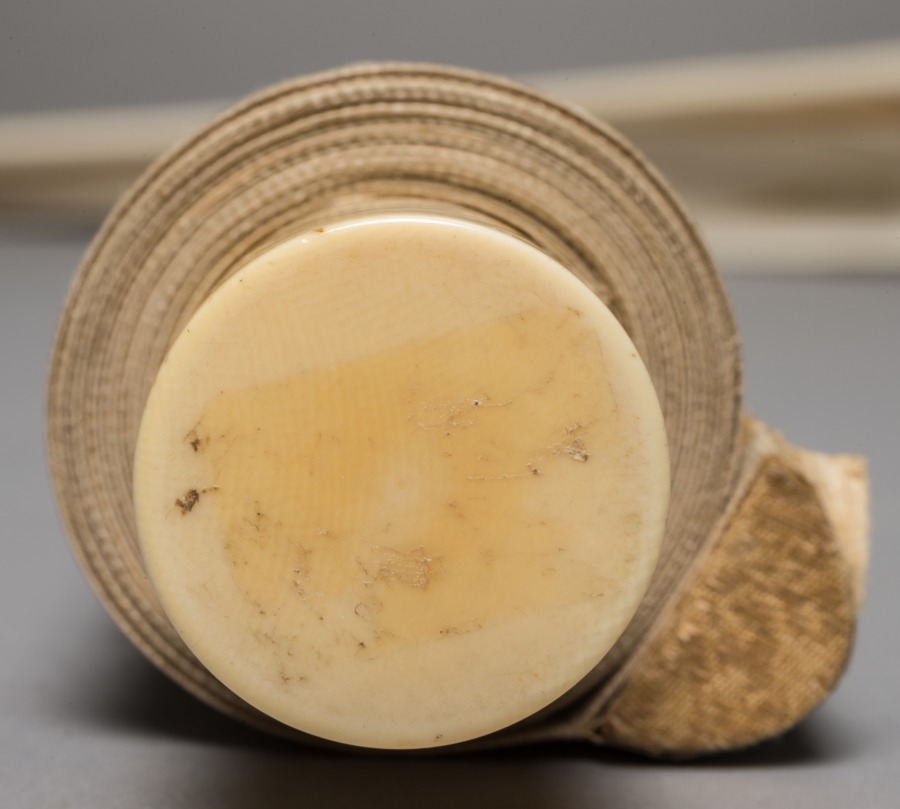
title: Tiger in Wind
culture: Japan, Edo period (1615–1868) to Meiji period (1868–1912)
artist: after Maruyama Ōkyo (Japanese, 1733–1795)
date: 1800s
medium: hanging scroll; ink on paper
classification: Painting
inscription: 「秋空一鶴」賛 長嘯一聲風括地「月渚」朱文方印「祐常之章」白文方印 壬辰初冬寫応挙 「應舉之印」白文方印・「仲選」白文方印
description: The seals appended to the inscription on this painting suggest that the text was brushed by Yūjō (1723–1773), an imperial prince who became a Buddhist monk and was abbot of Enman'in at Miidera. The line is from a poem attributed to a Yuan dynasty poet, Yu Ruyu (dates unknown), and describes the sound of a fierce wind lashing the ground. Wind is associated with the roar of the tiger. Yūjō was Maruyama Ōkyo's most important patron as a young artist, and this painting has a signature asserting that Ōkyo created it in 1772, the year before Yūjō's death. While Yūjō produced a preface for a now famous set of handscrolls he commissioned Ōkyo to paint, and a number of Ōkyo's compositions for Enman'in survive, this work would appear to be one imagining their relationship, as opposed to a genuine piece.